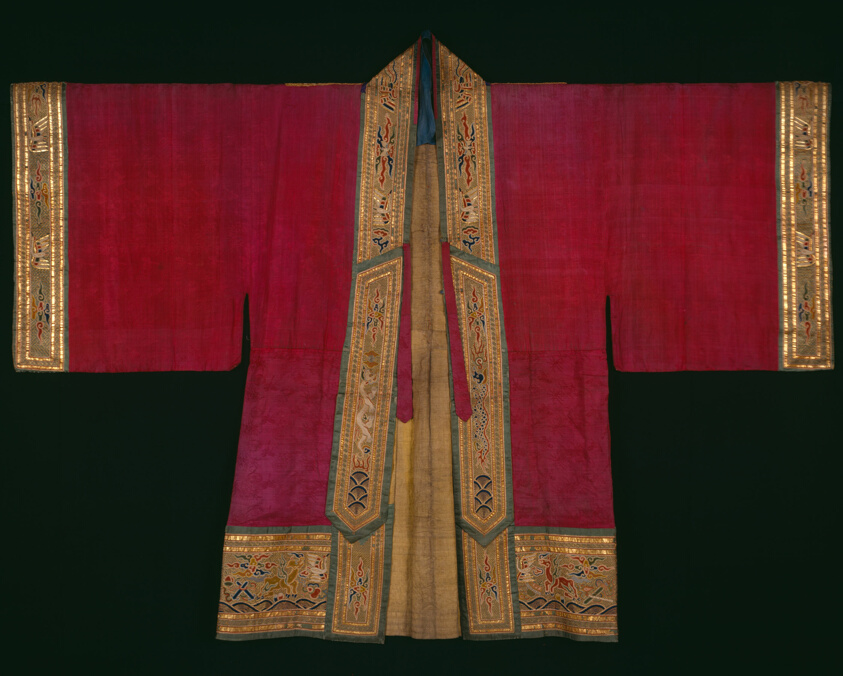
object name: Costume and Accessories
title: Vestment (For a Second-degree Taoist Priest)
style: qing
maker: Han-Chinese (China)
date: Qing dynasty (1644–1911), 1801/50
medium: Silk, warp-float faced 3:1 'S' twill weave self-patterned by areas of plain weave; edge bands and center back: silk, warp-float faced 7:1 satin weave; embroidered with silk, gold-leaf-over-lacquered paper, and gold-leaf-over-lacquered-paper-strip-wrapped silk in satin and knot stitches; laid work and couching; inner collar and closures: silk, weft-float faced 1:7 satin weave; collar patches: silk, warp-float faced 7:1 satin weave; lined with ramie, plain weave; lining fragments: silk, warp-float faced 4:1 satin weave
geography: China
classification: textile; needlework (visual works); weaving; costume